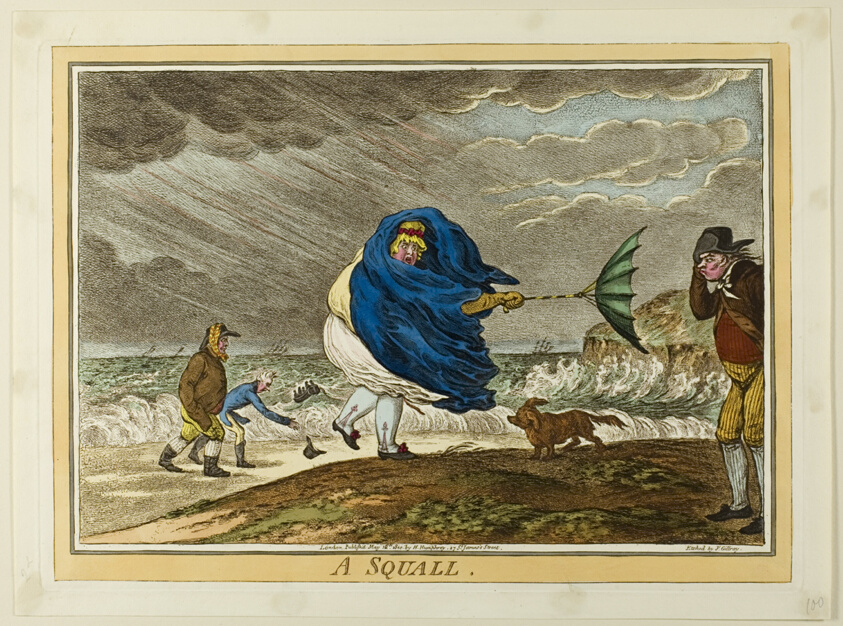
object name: Print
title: A Squall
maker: James Gillray (English, 1756-1815); published by Hannah Humphrey (English, c. 1745-1818)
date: published May 16, 1810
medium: Hand-colored etching on paper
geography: England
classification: etching; print; prints and drawing